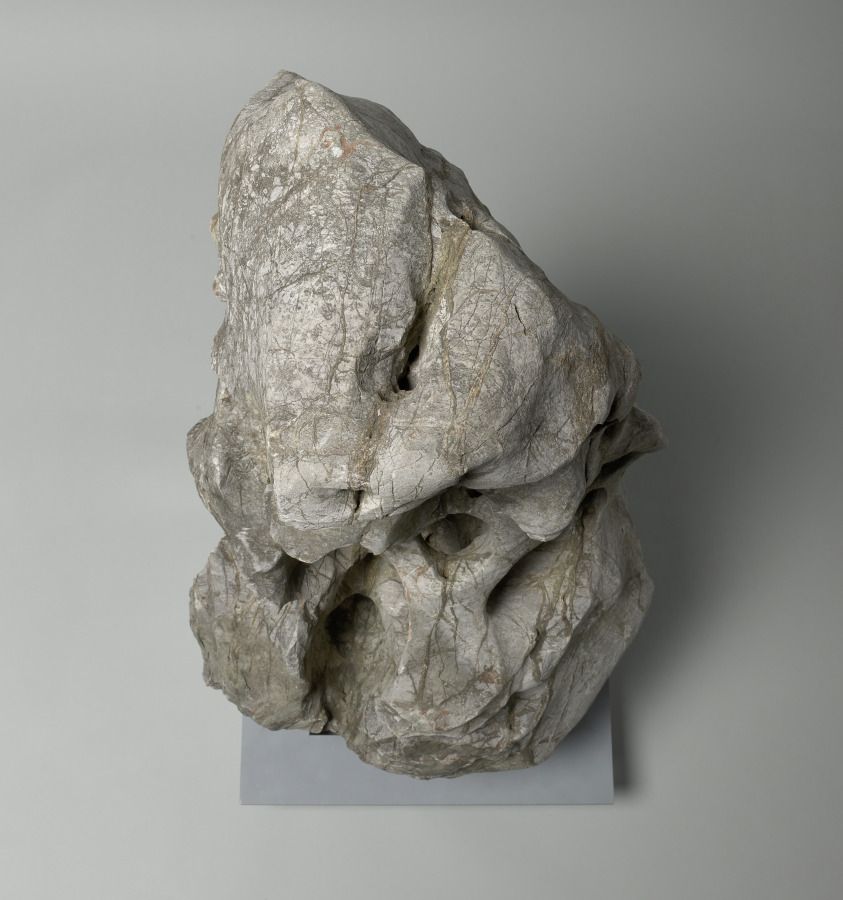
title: Taihu Garden Stone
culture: China, Jiangsu province, Wuxi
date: 0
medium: Limestone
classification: Stone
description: In China, rocks are considered elements of nature that possess spirit and life energy. With its upward winding masses, perforations, weathered surface, and multiple viewpoints, the stone exhibits sculptural qualities and embodies constant transformation through natural forces and human intervention. A solid piece of rock, it was originally sourced from the Lake Tai region. Stones were collected, set up in gardens, or installed on scholar’s desks as miniature mountains. Traditionally, Taihu stones were the most desirable type of rock. This stone is a gift by the contemporary artist Liu Dan, known for his depictions of rocks, who calls them "the stem cells of Chinese landscape."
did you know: The donor, Liu Dan, is the most prominent and celebrated painter of rocks in contemporary China.